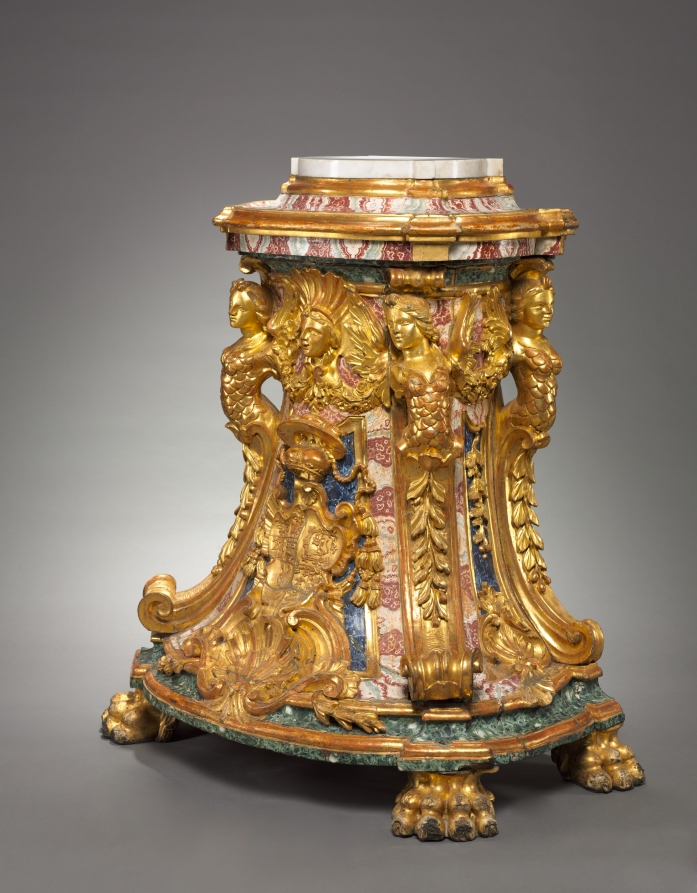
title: Pedestal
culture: Italy, Rome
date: mid-1700s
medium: carved, gilded, and painted wood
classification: Furniture and woodwork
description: The coat of arms on this pedestal is that of Cardinal York, the last of the Stuart pretenders to the British throne. He lived out his years in Rome, where he had been made a cardinal of the Church.